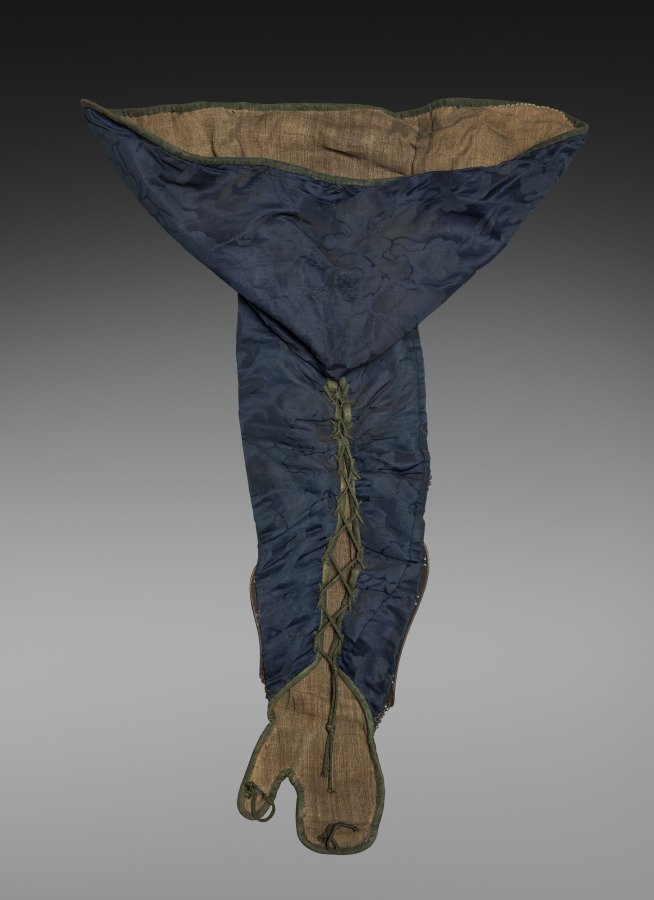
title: Armored Sleeve (Kote)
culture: Japan, Edo period (1615–1868)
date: 1600s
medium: Iron, lacquer, textile (silk)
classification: Arms and Armor